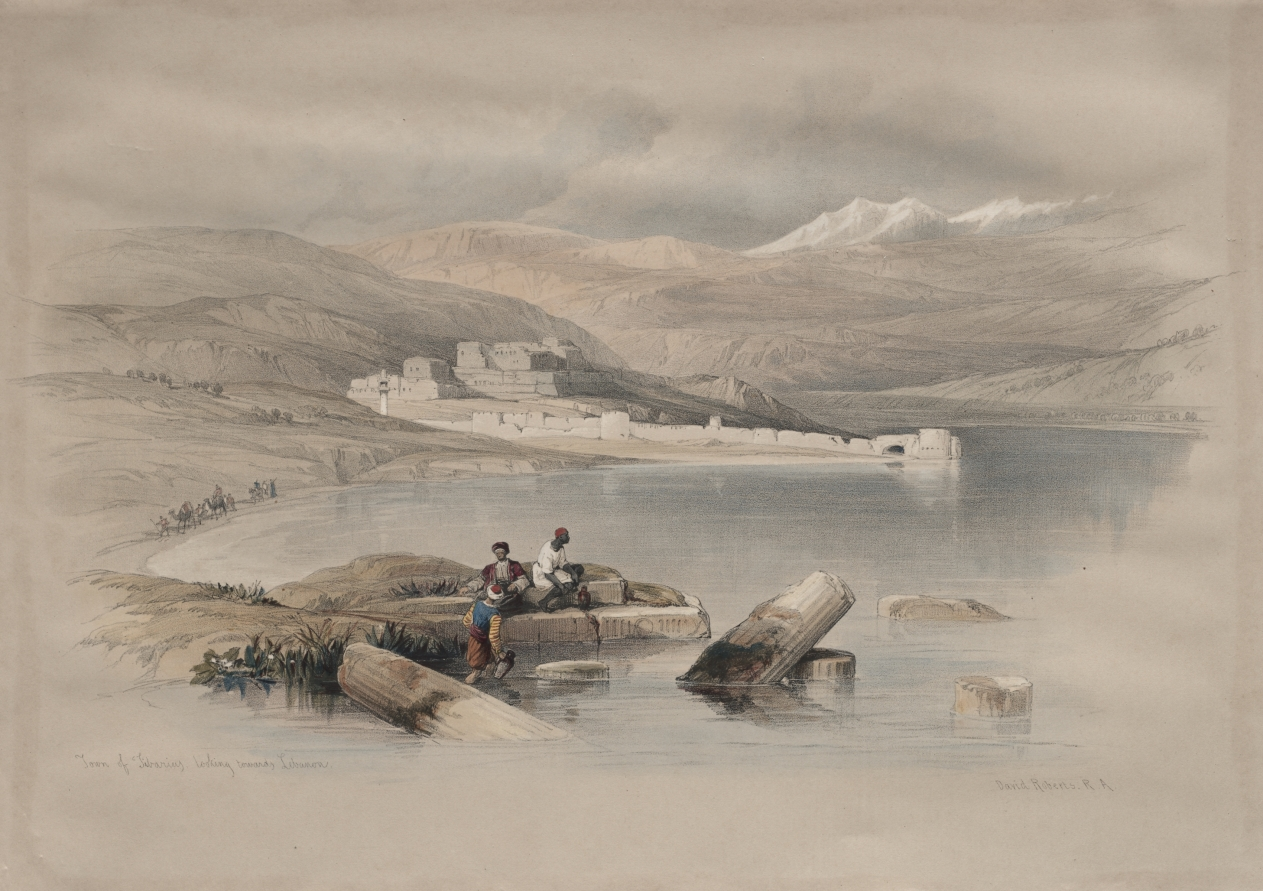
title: Town of Tiberias Looking Towards Lebanon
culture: England, 19th century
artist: David Roberts (Scottish, 1796–1864)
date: 1839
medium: color lithograph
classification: Print